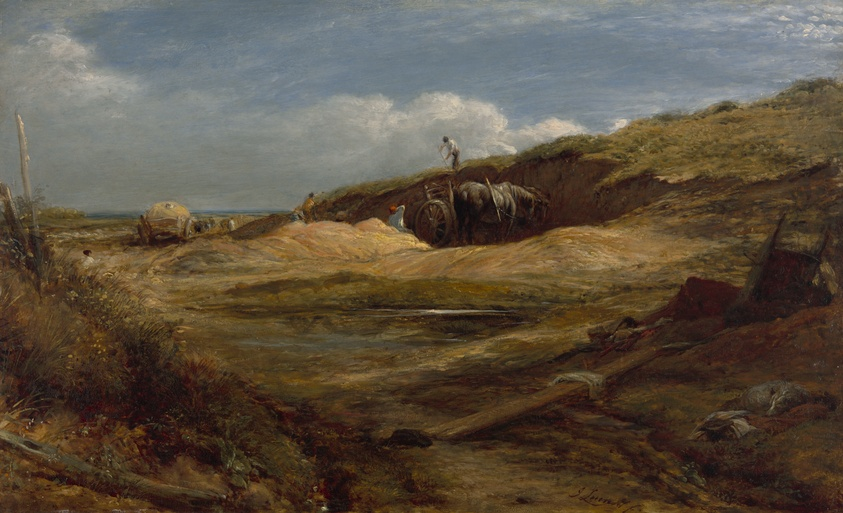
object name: Painting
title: The Sand Pits, Hampstead Heath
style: nineteenth century, 19th century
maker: John Linnell (English, 1792–1882)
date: 1834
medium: Oil on panel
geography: England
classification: oil on panel; european painting; oil paintings (visual works); painting; paint; france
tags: Sand Pits, animals, foliage, horse, horses, labor, landscape, men, paths, rural life, water, farm life, heath